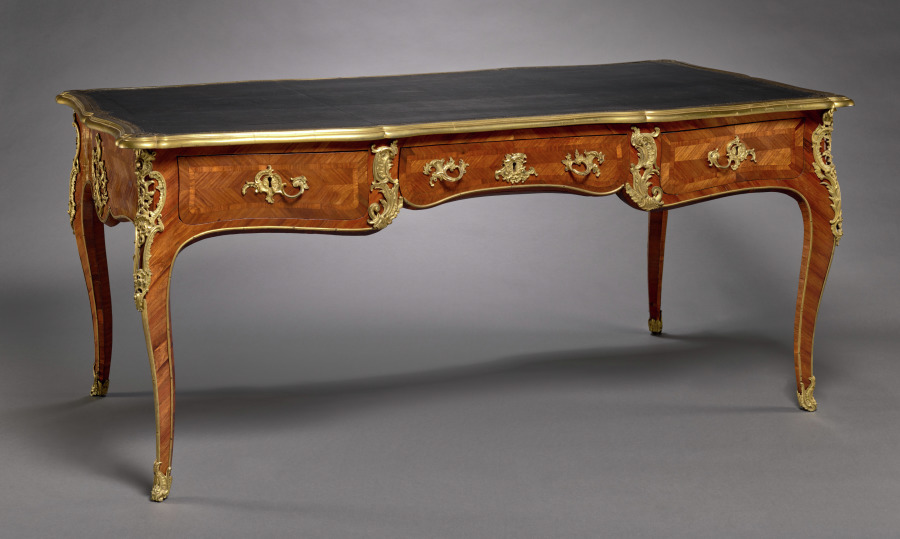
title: Table Desk (bureau plat)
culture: France, Paris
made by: Jacques Dubois (French, 1693–1763)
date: c. 1750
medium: wood marquetry with gilt bronze mounts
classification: Furniture and woodwork